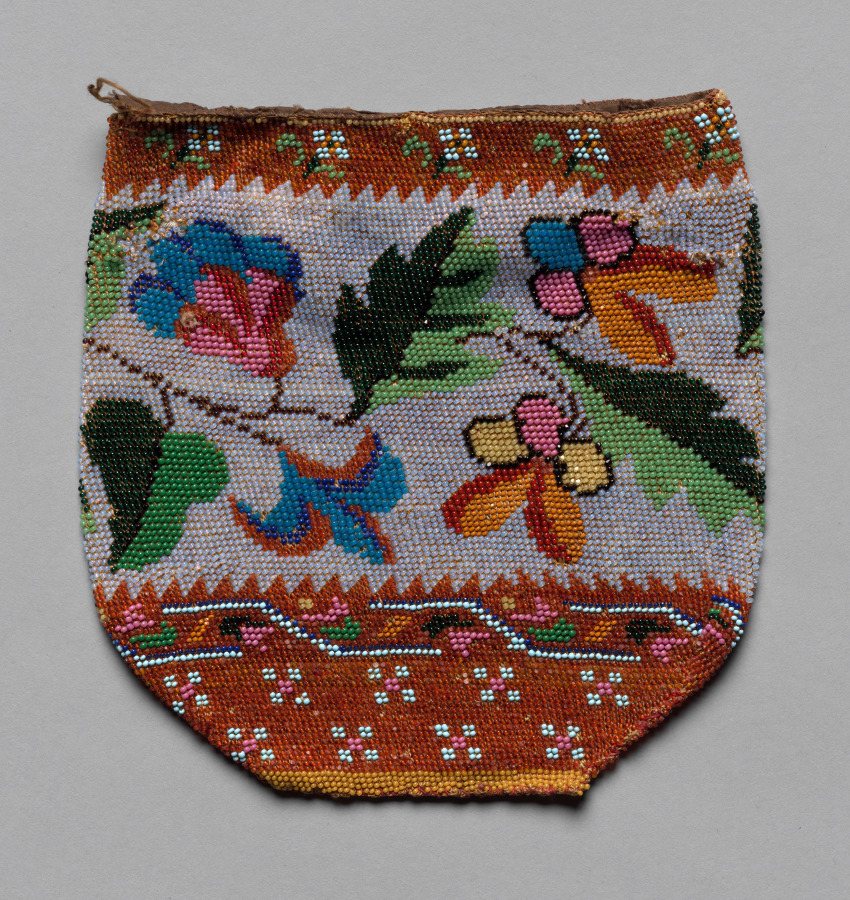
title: Beaded Bag (floral motif)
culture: America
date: 19th century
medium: glass beads, silk? lining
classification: Garment